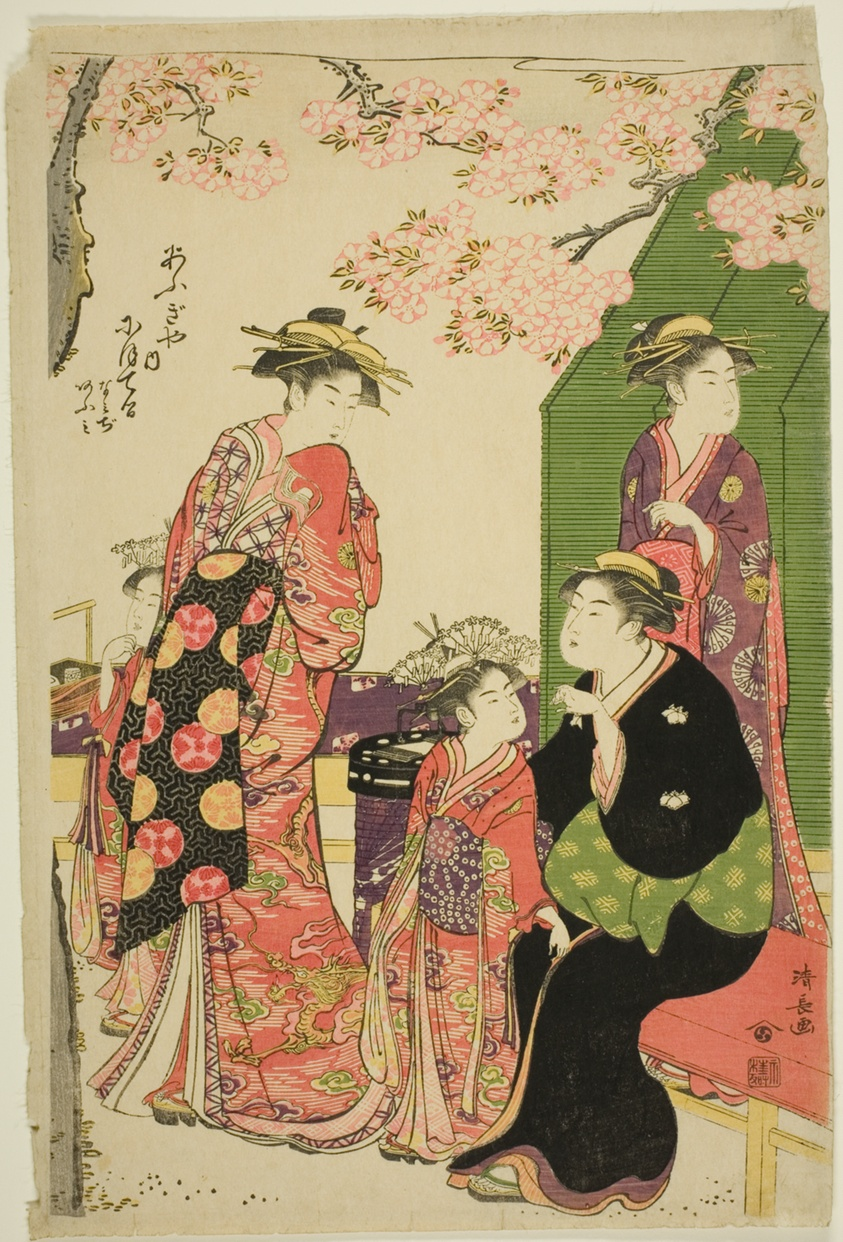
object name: Print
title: The Courtesans Nioteru, Namiji, and Omi of the Ogiya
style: Japanese (culture or style)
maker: Torii Kiyonaga (Japanese, 1752-1815)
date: 1785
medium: Color woodblock print; right sheet of oban triptych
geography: Japan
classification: woodblock print; print; asian art